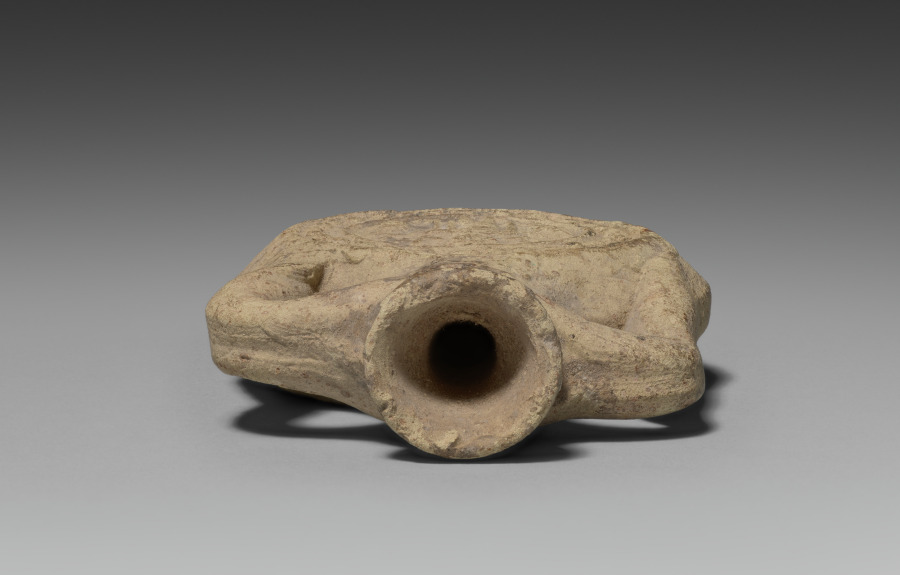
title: Pilgrim's Flask with Saint Menas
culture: Byzantine Empire, Abu Mena (Egypt)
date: 400–600 CE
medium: terracotta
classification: Ceramic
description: These flasks bear the image of Saint Menas, an early martyr of the Christian Church whose shrine was in the desert southwest of Alexandria in Egypt. These flasks were probably used by pilgrims to hold oil taken from the lamp that burned over this saint's tomb. Probably manufactured near the shrine, pilgrim's flasks often bear decorations hinting at their place of origin, as is the case here.